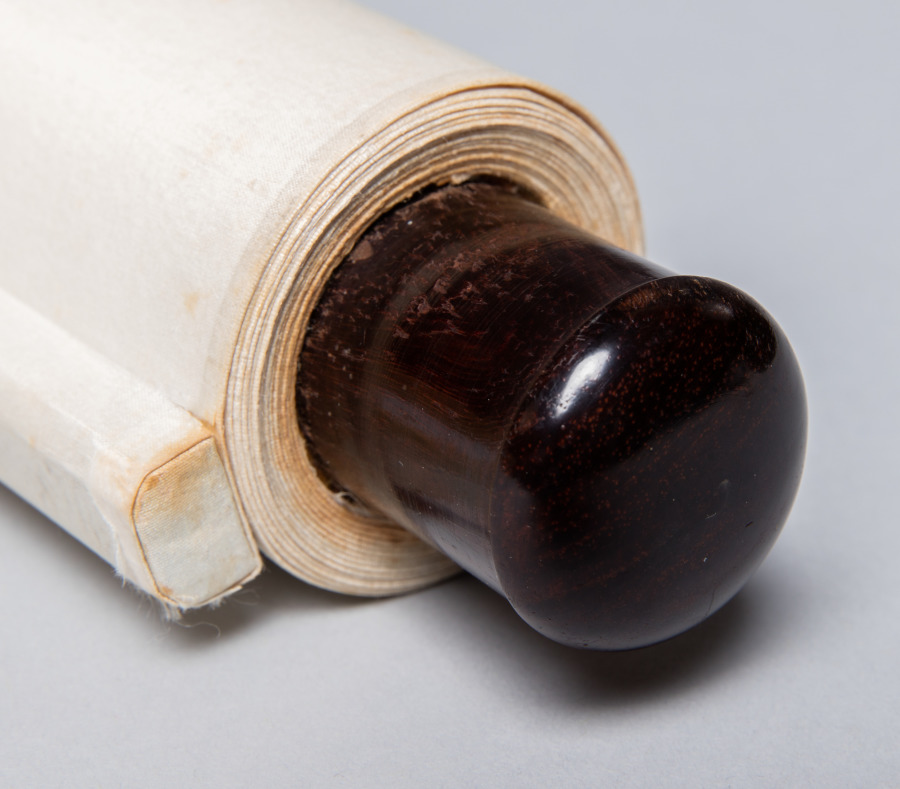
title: Mountain Market, Clear with Rising Mist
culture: Korea, Joseon dynasty (1392–1910)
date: early 1500s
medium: Hanging scroll; ink on silk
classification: Painting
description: This painting depicts several vignettes of the scholar-hermit’s various activities. In the lower left corner, the scholar-hermit is portrayed welcoming his guest in the courtyard. In the middle section on the lower bottom, the scholar and his guest are shown encountering another traveler on the bridge and exchanging their greetings. After crossing the bridge, the scholar visits a friend who lives in a compound of multiple buildings. The two friends decide to take a short walk. Both appear in a terraced cliff, enjoying a mountain vista and the fragrance of an old pine tree carried by the gentle wind. The scholar continues his journey with his two servants. They are portrayed crossing a winding wooden bridge. Right beyond the colossal rocky mountain, a panoramic view to a bustling market place unfolds, suggesting that it may be the place where the scholar-hermit’s entourage would visit. Perhaps the scholar need to buy items such as books, rolls of papers, and brushes, all essential to scholarly life. Toward the upper left corner, another group of travelers is landing on the river bank that leads to the city gate; they may be headed to the multistoried Buddhist stupa nestled on the top of the mountains.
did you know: Due to its stylistic features, this painting has long been believed to be a Chinese painting of the Northern Song period, dated to the 12th century.